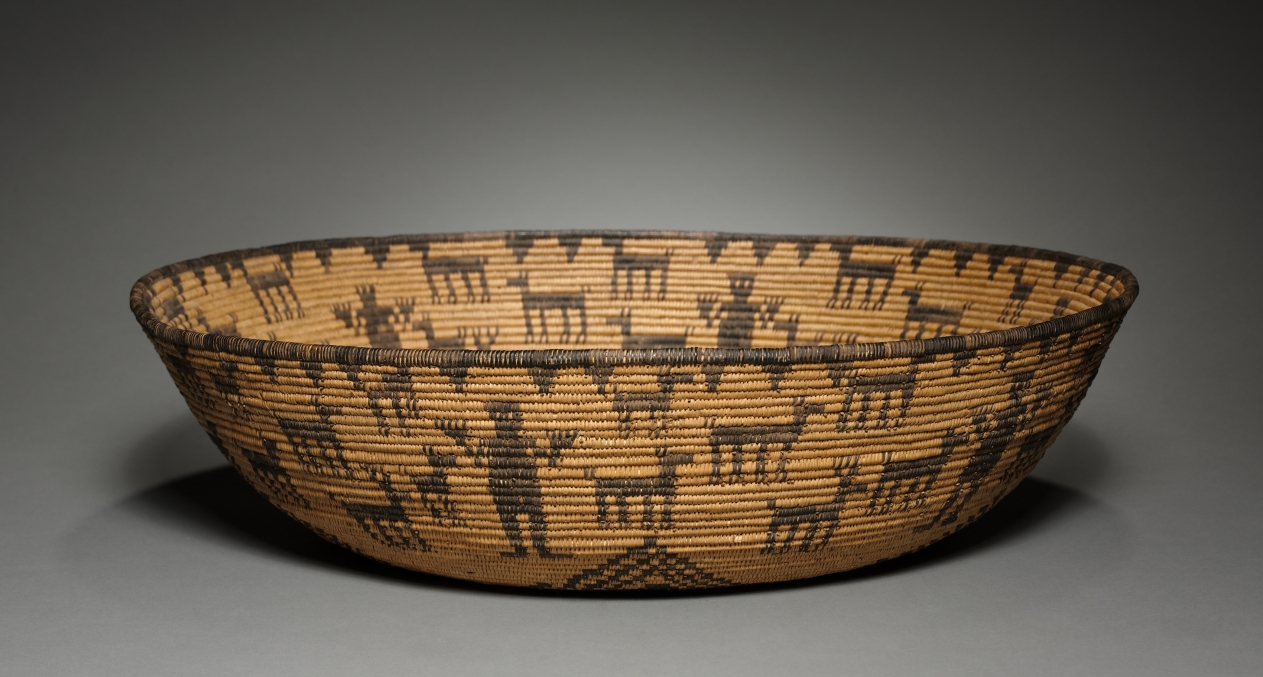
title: Tray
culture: Southwest, Apache, Western, early 20th century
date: early 1900s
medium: basketry, coiled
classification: Basketry